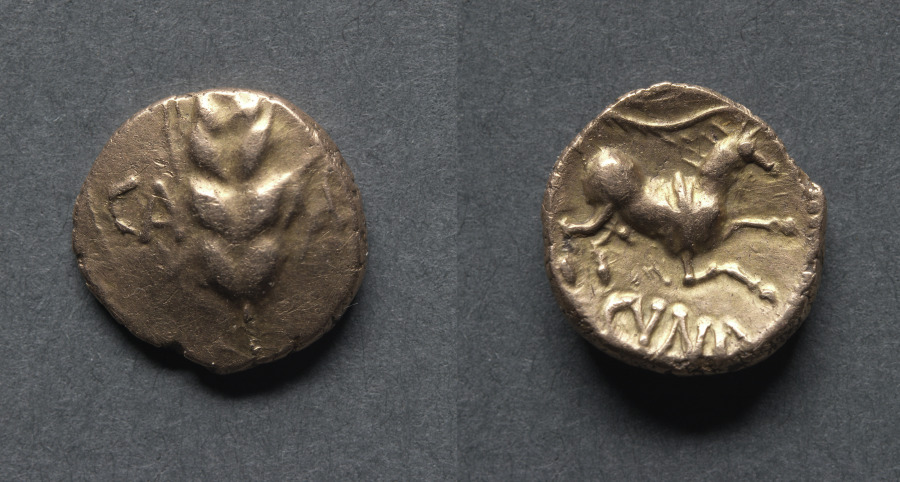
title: Cunobeline Quarter Stater: Corn (obverse); Horse and Branch (reverse)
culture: England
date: c. 10–40 CE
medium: gold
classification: Coins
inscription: CA MV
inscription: CVNO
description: The ear of corn or wheat is frequently found on coins of Cunobeline. The workmanship on the horse is not as good as another in the collection, 1969.152. The relative proportions of the head and neck are poor and the animal has acquired an additional joint in its right foreleg, though this does not appear on all specimens.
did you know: Cunobeline (Strong as a Dog), was a king in pre-Roman Britain from about AD 9 until about AD 40.